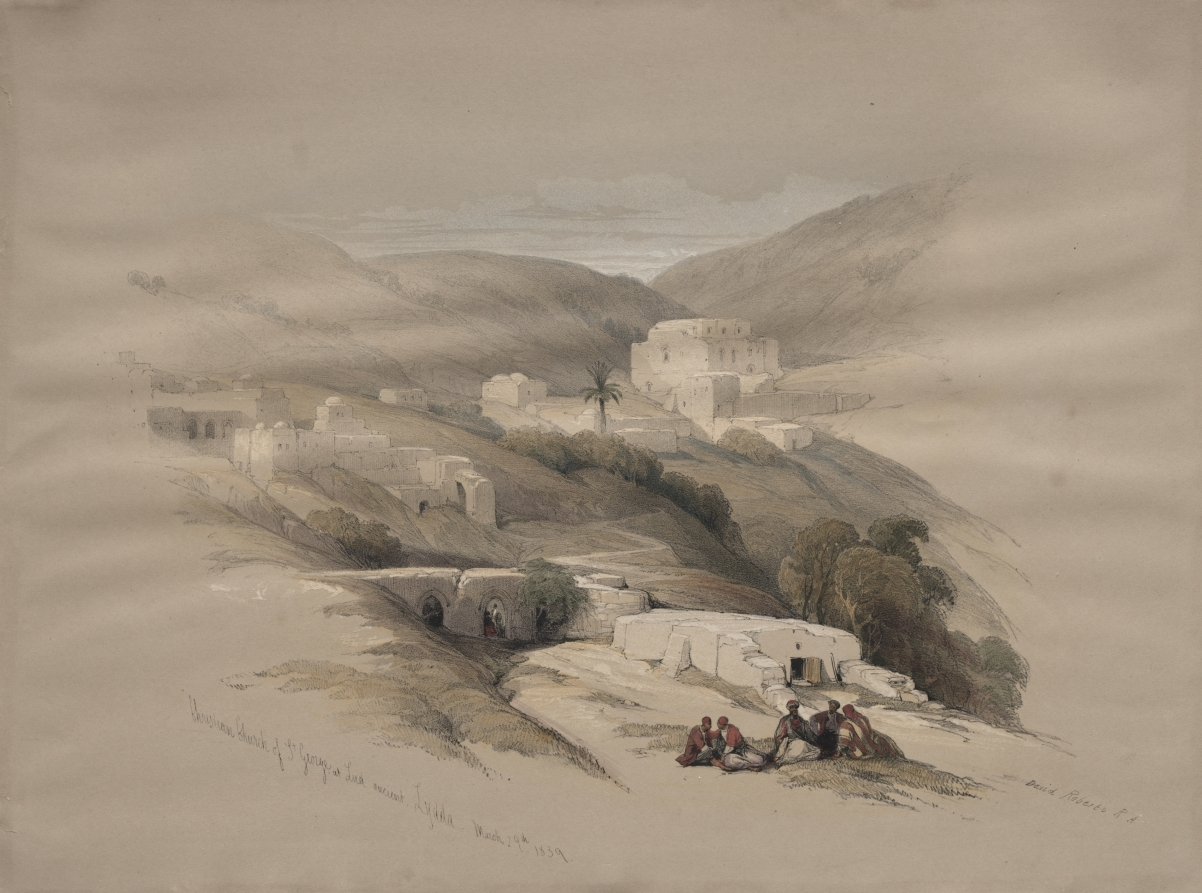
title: Christian Church of St. George at Ludd, ancient Lydda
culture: England, 19th century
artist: David Roberts (Scottish, 1796–1864)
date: 1839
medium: color lithograph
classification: Print